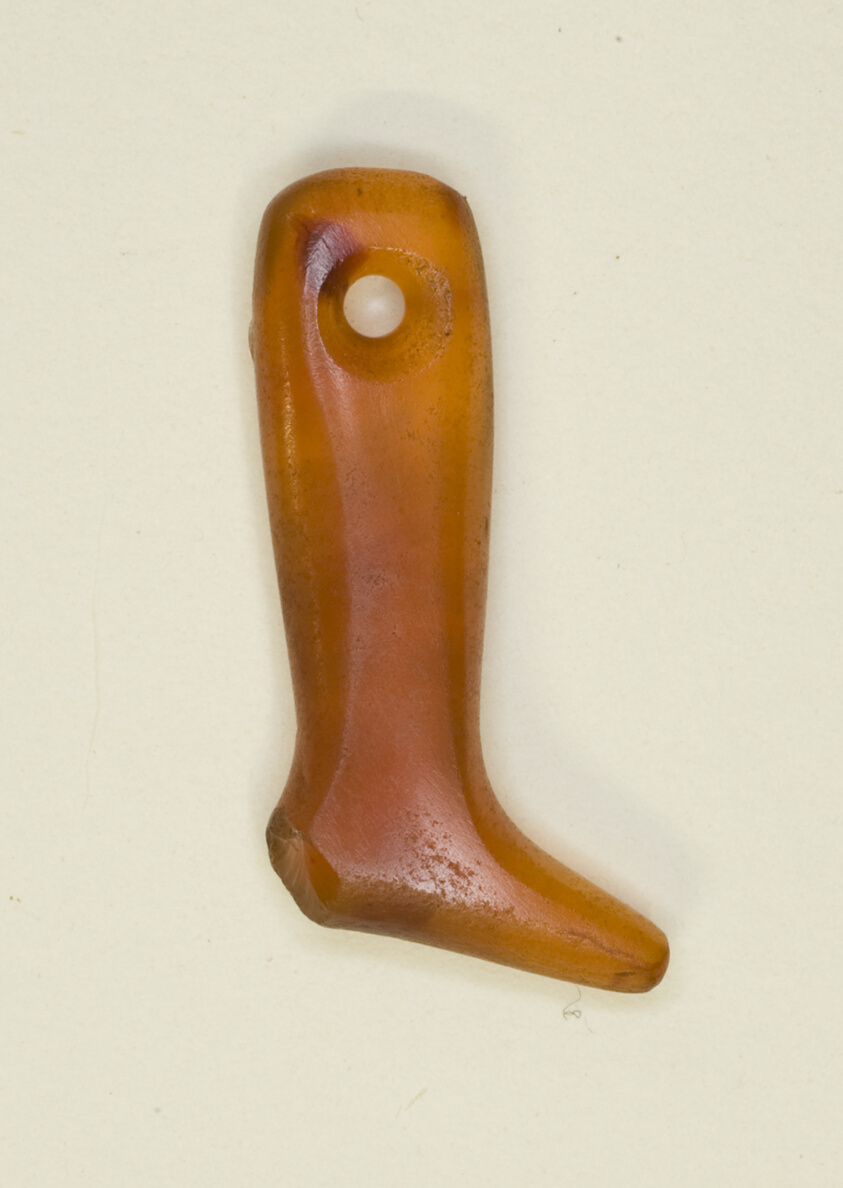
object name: Costume and Accessories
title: Amulet of a Leg and Foot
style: old kingdom, egyptian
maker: Egyptian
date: Late Old Kingdom–First Intermediate Period, Dynasty 5–11 (about 2494–2055 BCE)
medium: Carnelian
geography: Egypt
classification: amulet; stone; jewelry; ancient art; costume